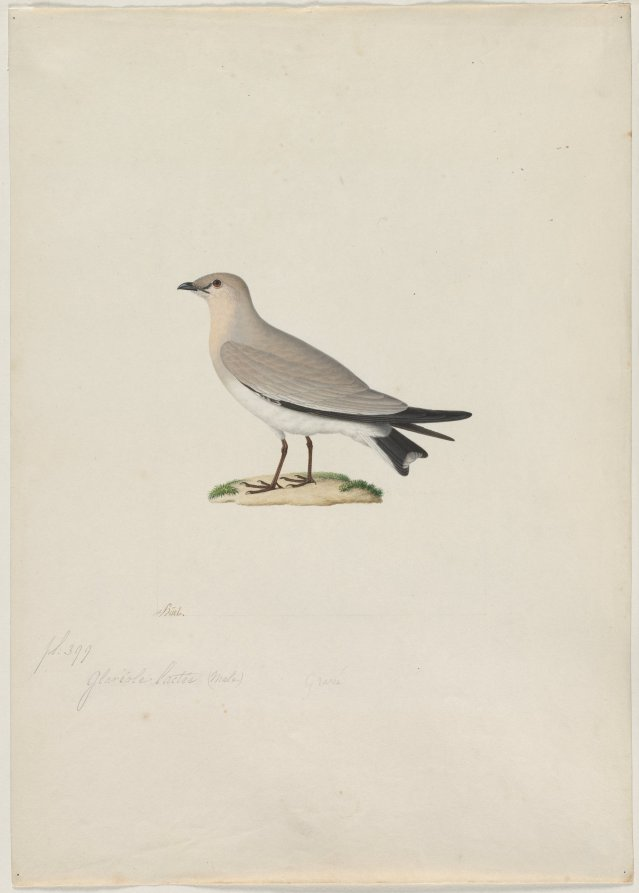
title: Small Pratincole (Glareola lactea)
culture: France, 19th century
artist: attributed to Paul Hüet (French, 1803–1869)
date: 1800s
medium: watercolor and gouache; framing lines in graphite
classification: Drawing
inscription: signed, lower left, in brown ink: =hüet. ; lower left, in graphite: pl: 399 / [illegible, partially erased] / glaréole lactée (male.) [written over illegible insciption] ; lower center, in graphite: Gravé